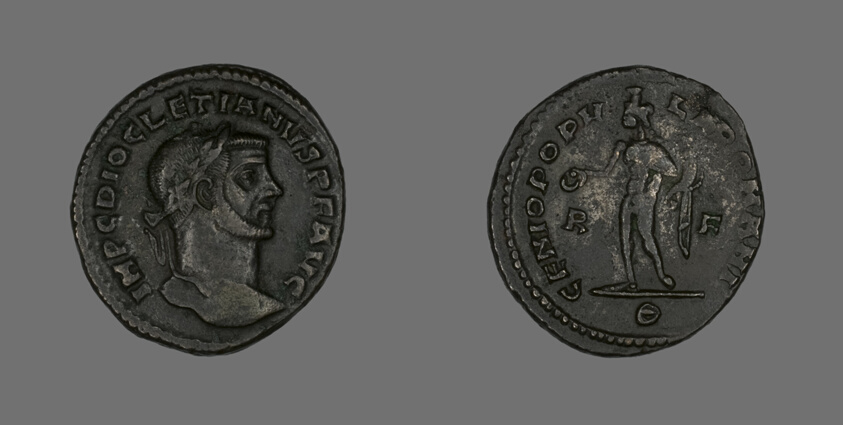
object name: Coin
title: Follis (Coin) Portraying Emperor Diocletian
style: roman (ancient, style or period)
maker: Roman, minted in Rome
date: 298-299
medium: Bronze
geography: Roman Empire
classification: coin; ancient art